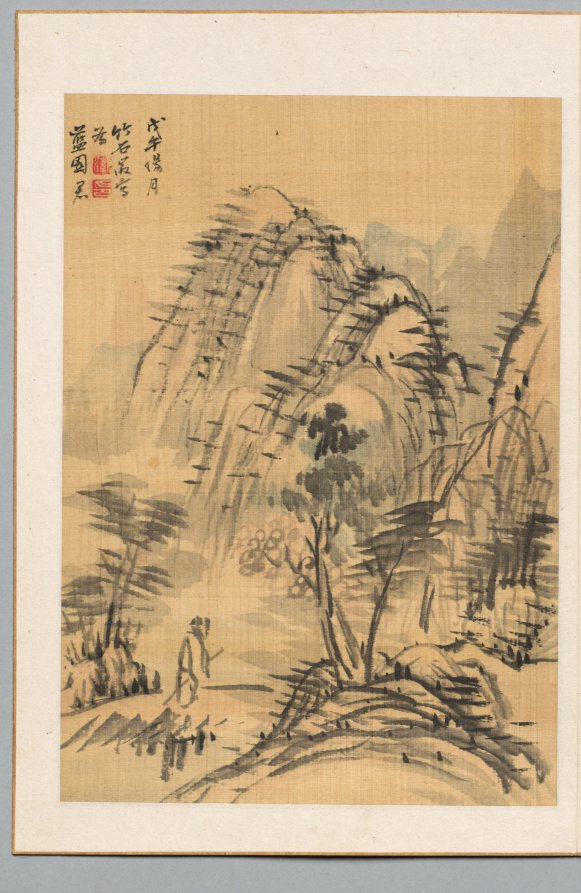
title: Landscape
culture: Japan, Edo period (1615–1868)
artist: Nagamachi Chikuseki (Japanese, 1747–1806)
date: 1798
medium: leaf from a pair of folding albums; ink and light color on paper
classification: Portfolio